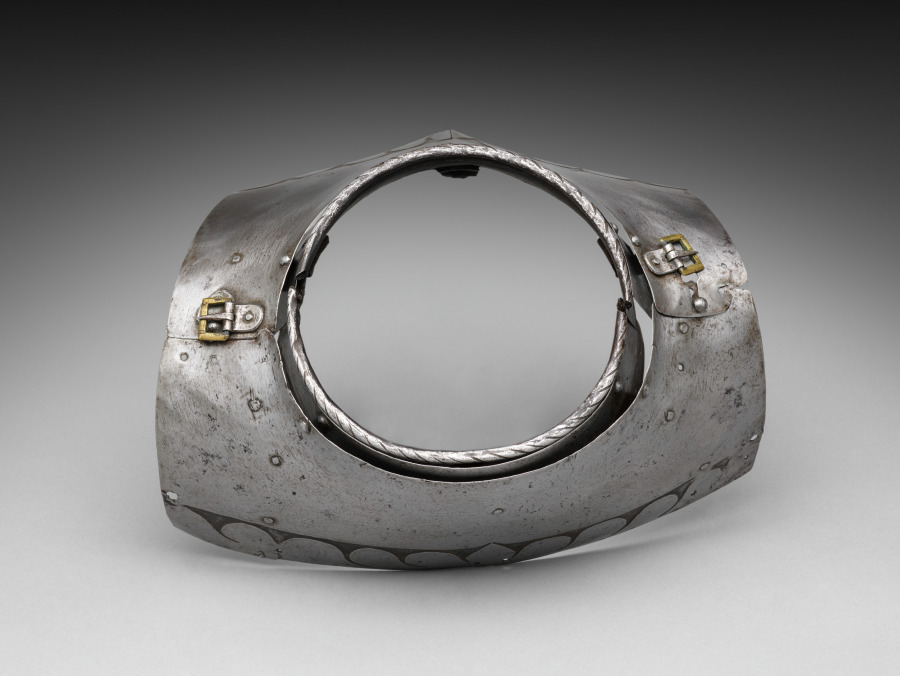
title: Gorget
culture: Germany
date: 1500s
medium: steel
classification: Arms and Armor